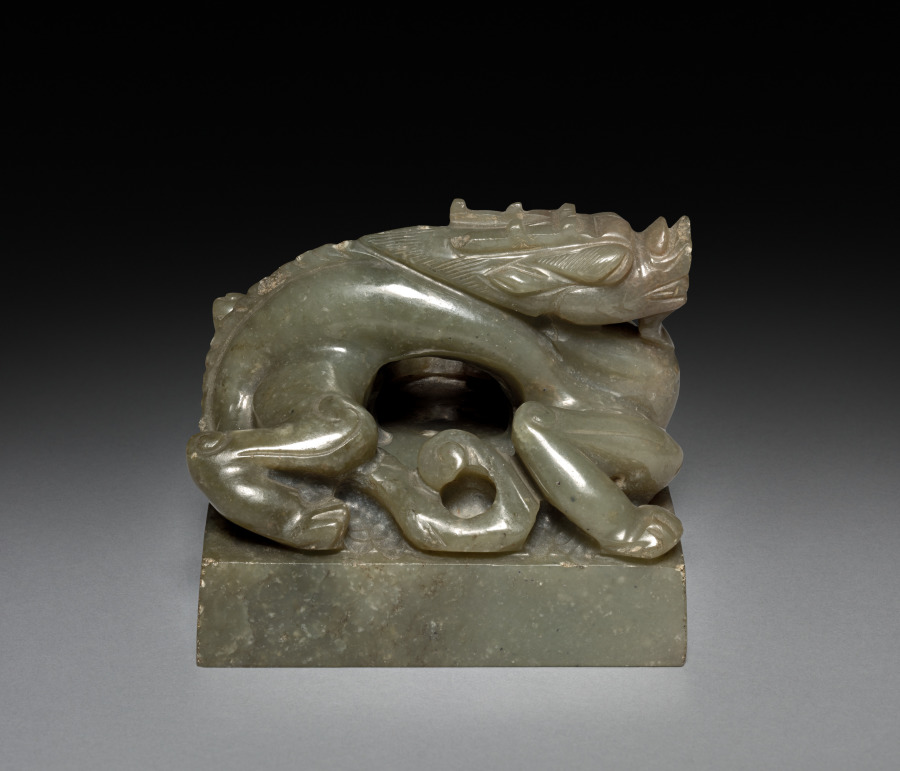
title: Seal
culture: China, Qing dynasty (1644-1911)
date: 1700 or later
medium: Jade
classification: Jade